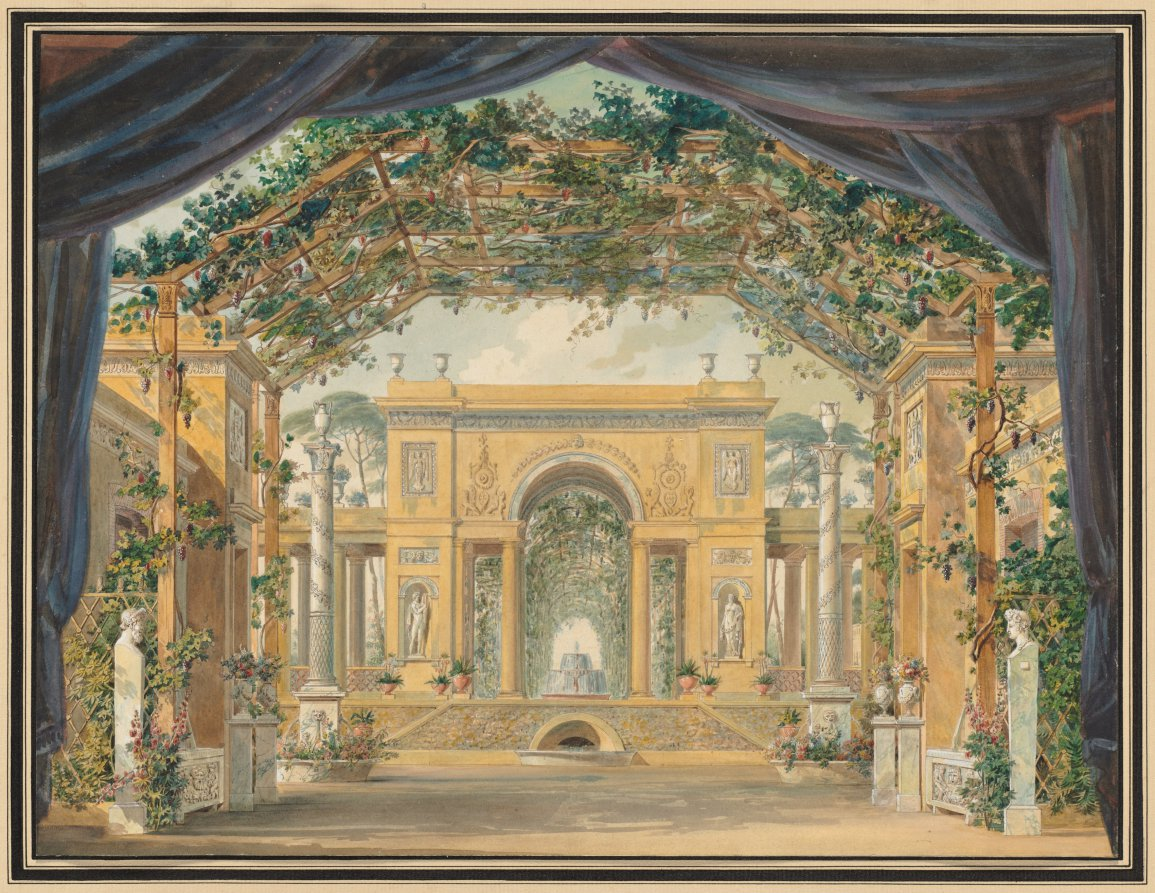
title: Decoration Executed for the Birthday of His Majesty the King of Westphalia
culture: France, 19th century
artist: Pierre-Luc-Charles Cicéri (French, 1782–1868)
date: 1811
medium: Pen and black ink and watercolor with graphite; heightened with white gouache on off-white wove paper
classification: Drawing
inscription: verso, center right, in graphite: 1930; secondary support, lower center, in graphite (under primary support): Bas; lower center, in brown ink: décoration Exécutée pour l'anniversaire de la naissance de S. M. le Roi de Wesphalie, / Ordonnée par Monsieur bruguière Surintendant des théatres. / Dessin exécuté au théâtre de Cassel en 1811, par cicéri, Ier ["er" underlined] peintre de l'Opéra.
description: A scenic designer for the Paris Opera, Cicéri created this decoration for a performance celebrating the birthday of Emperor Napoleon’s brother, Jérôme Bonaparte (1784–1860), King of Westphalia, a vassal state of territories taken from Prussia and its allies. Antoine-André Bruguière, named in the inscription as the commissioner of the decoration, was Westphalia’s secretary of the ministry of war and the superintendent of theaters in Kassel, the state’s capital city. The title of the special performance is unknown, but the triumphal arch, Corinthian columns topped with vases, and classical statues all suggest a Roman theme.